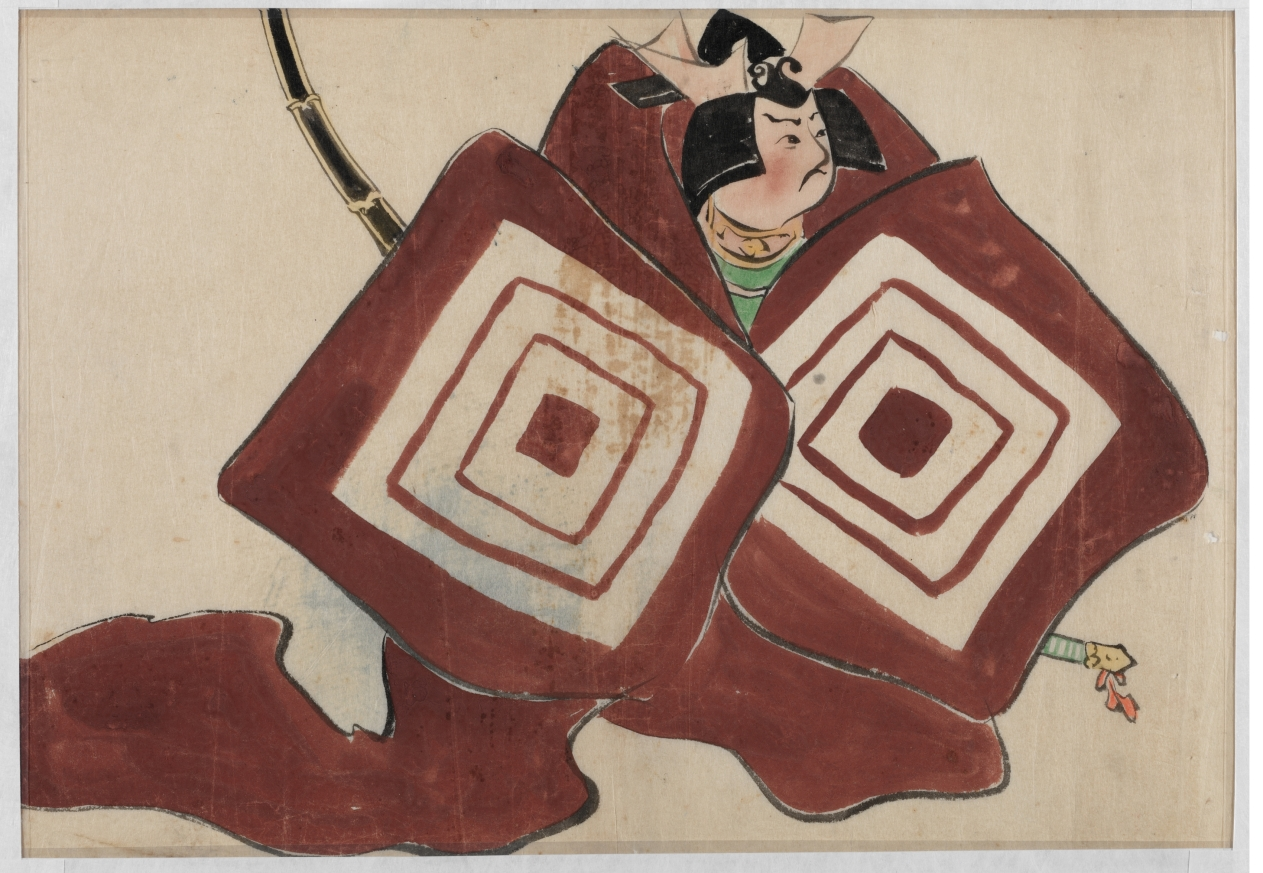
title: Flowers of a Hundred Worlds (Momoyogusa): Shibaraku (Shibaraku)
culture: Japan, Meiji period (1868–1912)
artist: Kamisaka Sekka (Japanese, 1866–1942)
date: 1909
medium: ink and color on paper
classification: Drawing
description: Kamisaka Sekka made preparatory drawings for his Flowers of a Hundred Worlds series on tracing paper with ink and color. The freehand sketches are much looser than the finished, printed compositions.